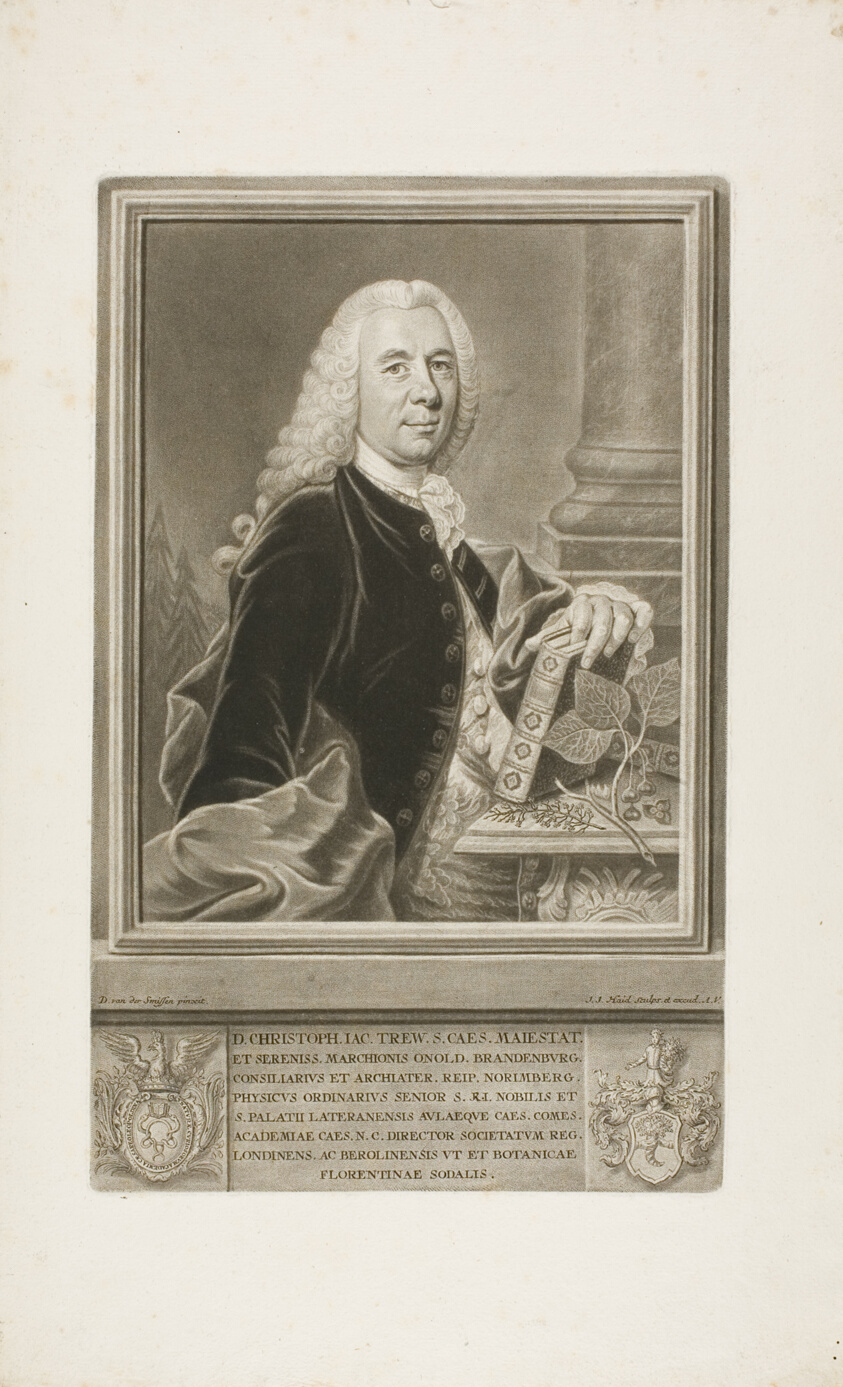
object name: Print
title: D. Christopher Jacob Trew, from Plantae Selectae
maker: Johann Jacob Haid (German, 1704-1767); after Dominicus van der Smissen (German, 1704-1760)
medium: Mezzotint on paper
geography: Germany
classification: mezzotint; print; prints and drawing